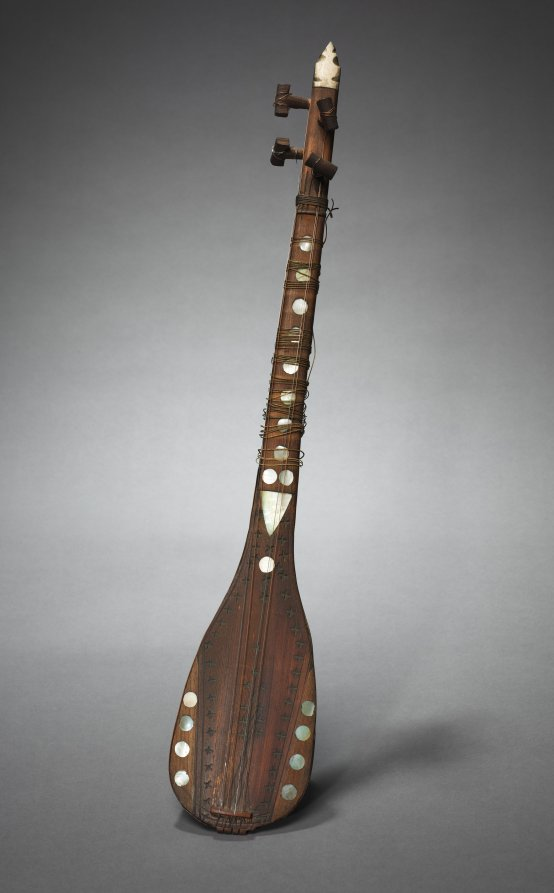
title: Tanbūr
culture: Syria or Turkey, Ottoman period (1299–1922)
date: late 1800s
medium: Wood, bone, mother-of-pearl, and wire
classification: Musical Instrument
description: This long-necked lute collected in Ottoman Syria possesses traits that are Syrian, Turkish, and Iranian and provides an example of the musical interaction between cultures. It is an ancient instrument and resembles lutes used in Pharaonic Egypt and Mesopotamia. In its many forms, the tanbūr was a common instrument throughout the Islamic world. It is often used as a solo instrument in both sacred and secular contexts. Burn marks decorate the pear-shaped body along with inlaid dots of mother-of-pearl, which may also have helped with navigation of the fret board by the player.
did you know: The two pairs of wire strings would be played with a quill plectrum.